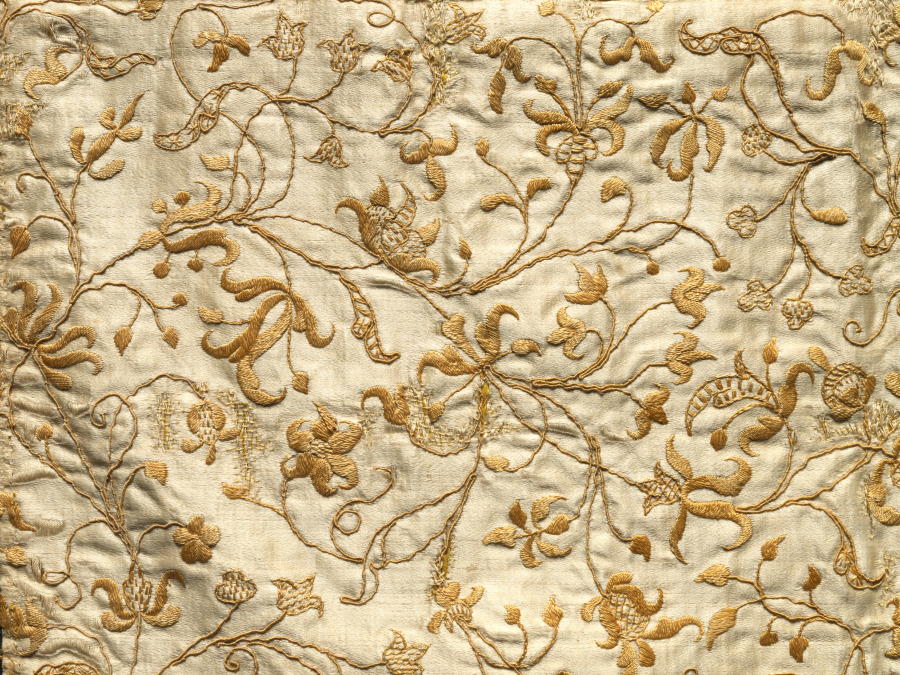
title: Embroidered Square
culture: Italy, 17th-18th century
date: 1600s-1700s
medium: embroidery, silk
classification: Embroidery